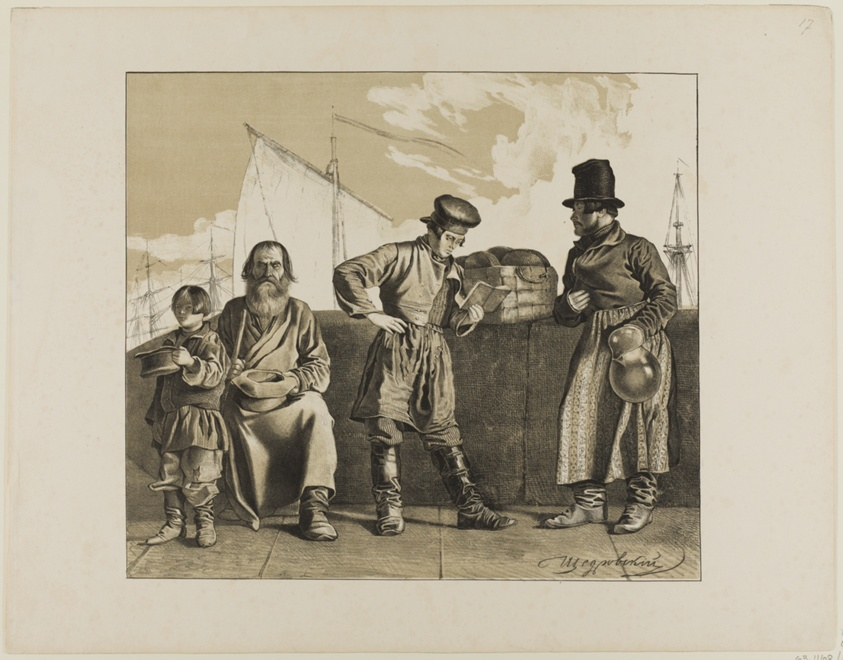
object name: Print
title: Scenes from Russian Folk Life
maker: Ignatii Stepanovich Shchedrovskii (Russian, 1815-1870)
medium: Color lithograph on paper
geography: Russia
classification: lithograph; print; prints and drawing